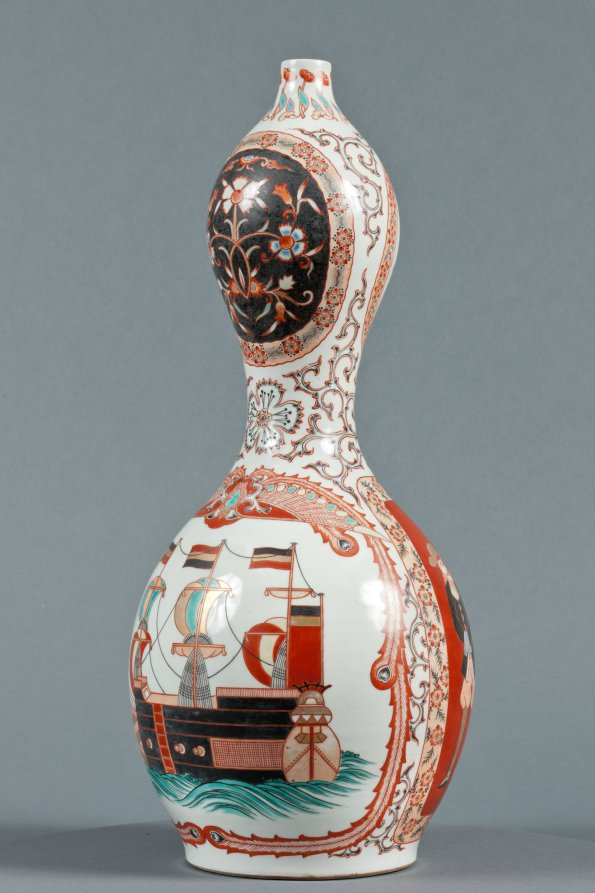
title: Bottle with Western Ships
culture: Japan, Edo period (1615–1868)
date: c. 1800–1868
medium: Porcelain with decoration in colored enamels and underglaze blue, overglaze enamels, and gold (Hizen ware, Arita type)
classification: Ceramic